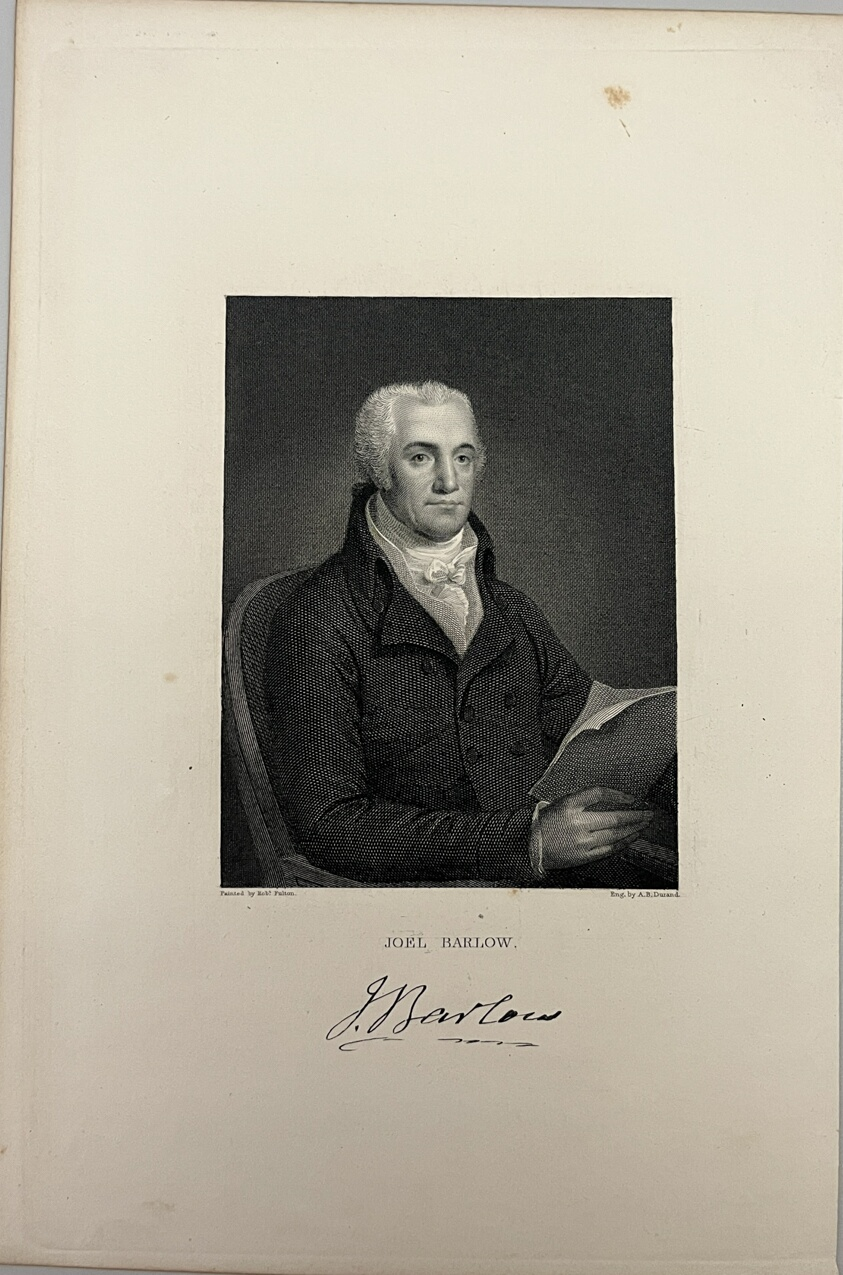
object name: Print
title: Joel Barlow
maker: Asher Brown Durand (American, 1796-1886); after Robert Fulton (American, 1765-1815)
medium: Steel engraving on paper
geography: United States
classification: reproduction; print; prints and drawing